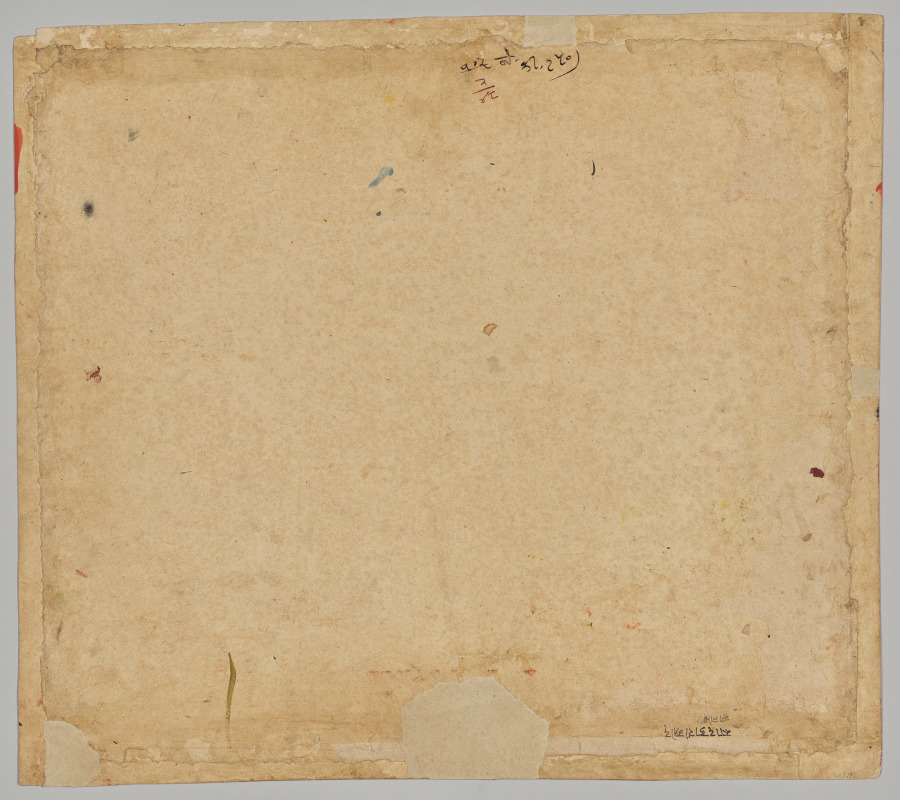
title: Maharana Sangram Singh II of Mewar (r. 1710–34) and Stages a Boar Hunt with Tigers at Sadri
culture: Northwestern India, Rajasthan, Rajput Kingdom of Mewar, Udaipur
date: c. 1720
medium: gum tempera, ink, and gold on paper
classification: Painting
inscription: [[verso, in red]] 2/48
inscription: [[verso, upper right corner]] sāḍāri od kālo cita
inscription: [[verso, in black, along bottom]] 102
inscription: [[verso, in black, to right of old inventory number]] Kimat RS 150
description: The king, who has the title of “maharana” in this region, is identifiable by his halo. At the bottom of the composition, he is pictured three times, welcoming two distinguished visitors who arrived in palanquins. He is shown again, standing behind a safety net at the corner of the white platform. He aims his arrow to shoot the boar and demonstrate his skill and virility. Two tigers are led into the arena at the top edge, and they are depicted multiple times chasing and capturing the prey.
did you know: The enclosure wall is shown from multiple perspectives, sometimes from above, sometimes in elevation.